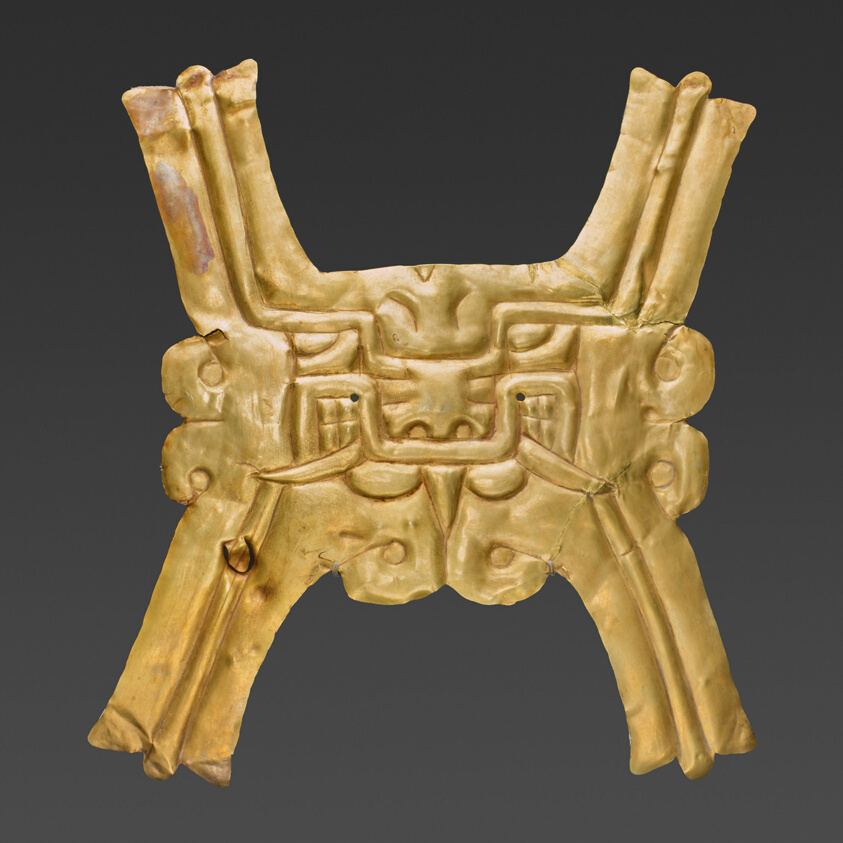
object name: Costume and Accessories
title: Gold Pectoral with Zoomorphic Face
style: chavín horizon, americas, andes, north coast, Arts of the Americas, andean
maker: Chavín (North coast, Peru)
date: c. 500 BCE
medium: Gold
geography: Peruvian North Coast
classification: pectoral; gold; jewelry; art of the americas; costume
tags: supernatural, status, serpents, feline, gold (color), ornaments